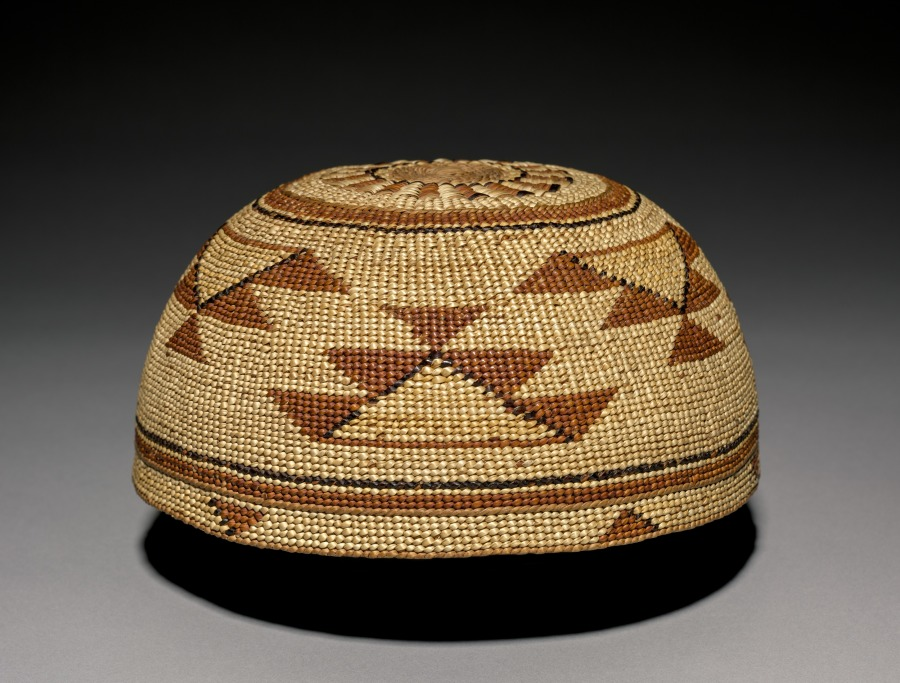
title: Hat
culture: California, late 19th- early 20th century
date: c 1875–1917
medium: plain-twined hazel with decoration in beargrass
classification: Basketry